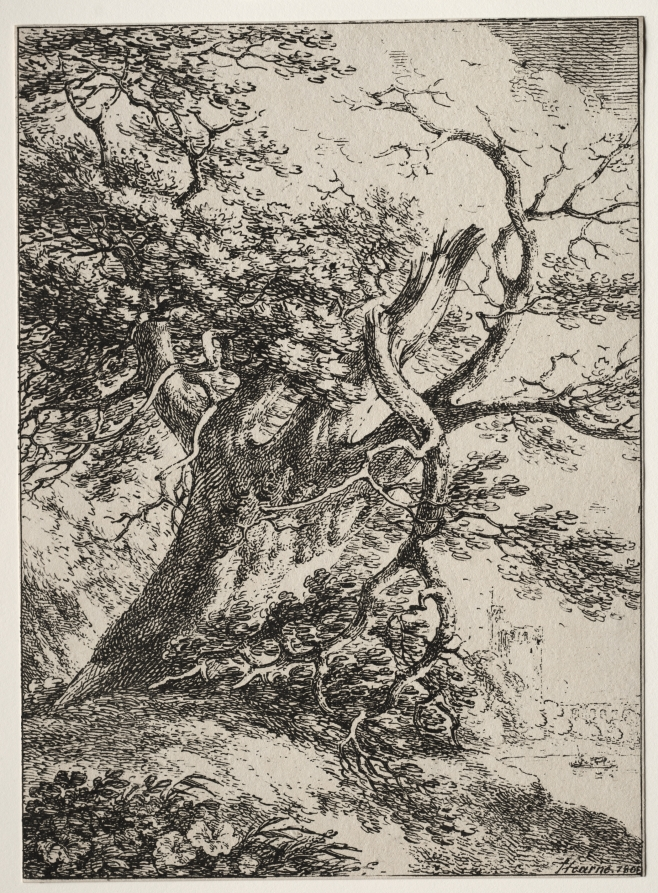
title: Specimens of Polyautography: Landscape with an Oak Tree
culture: England, early 19th Century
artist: Thomas Hearne (British, 1744–1817)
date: 1803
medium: lithograph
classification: Print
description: The first portfolio of artists’ lithographs was published in 1803, just five years after Alois Senefelder invented the medium in Munich in 1798. Entitled Specimens of Polyautography, the publication included twelve lithographs by British, French, German, and Swiss artists. Figures contemplating the landscape and atmospheric tree studies were dominant subjects among these early pen lithographs.